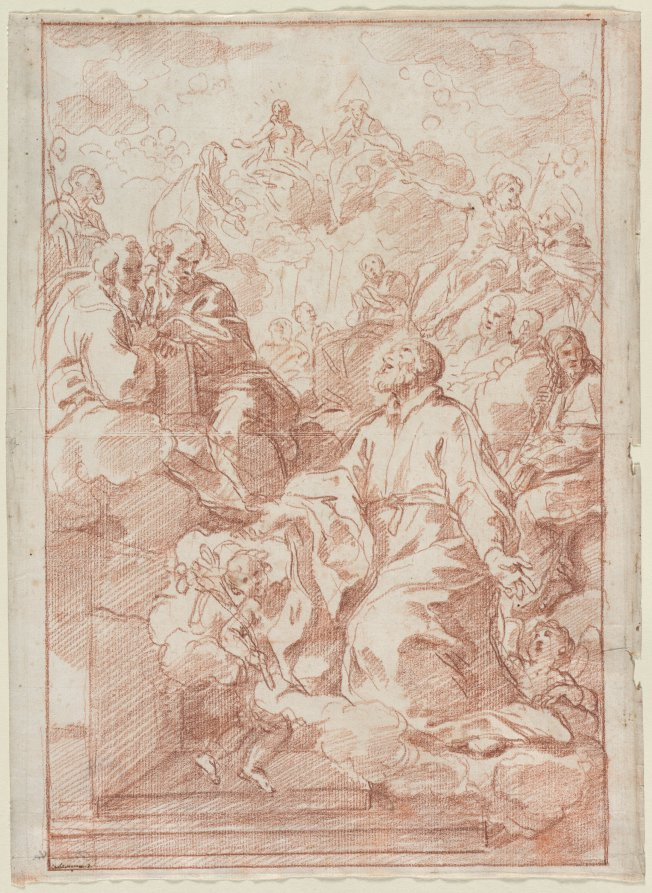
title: Vision of St. Philip Neri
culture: Italy, 17th century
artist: Carlo Maratti (Italian, 1625–1713)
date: c. 1673–75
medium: red chalk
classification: Drawing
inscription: lower left, in brown ink: Carlo Maratti . F. ; VERSO, center left, in black chalk[?]: [5?]6 [underlined, sideways] ; lower center, in brown ink (iron gall): C ; lower right, in brown ink: Maratta